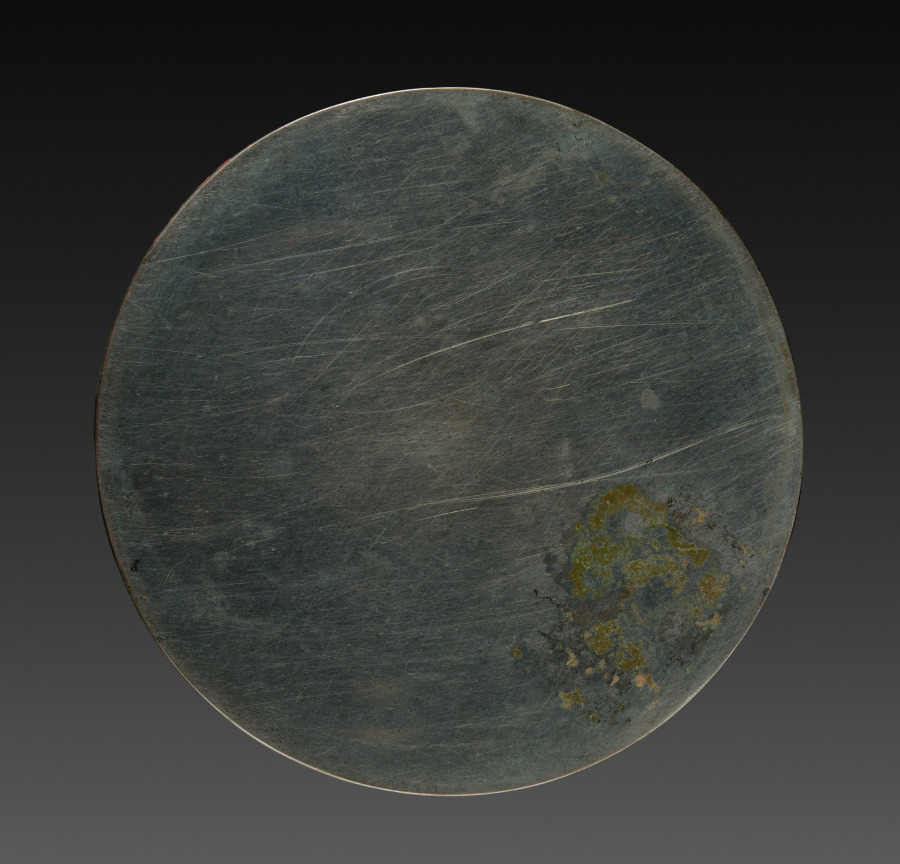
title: Mirror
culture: Japan, Edo period (1615–1868)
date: 1615–1868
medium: bronze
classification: Metalwork